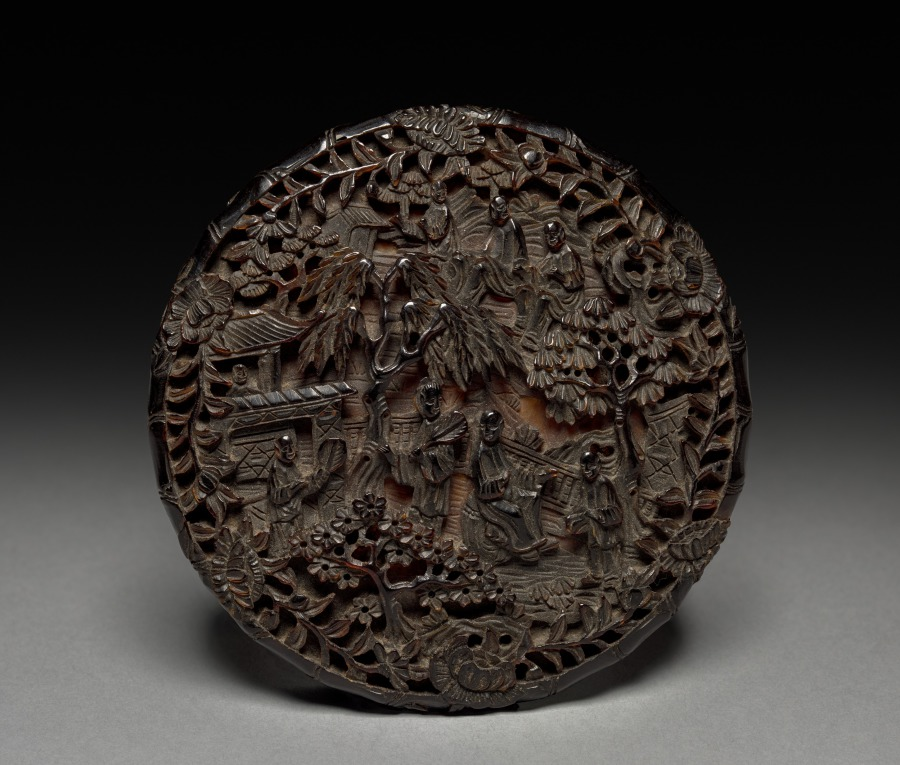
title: Fragrance Box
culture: China, Qing dynasty (1644-1911)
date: 1700s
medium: tortoiseshell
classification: Miscellaneous